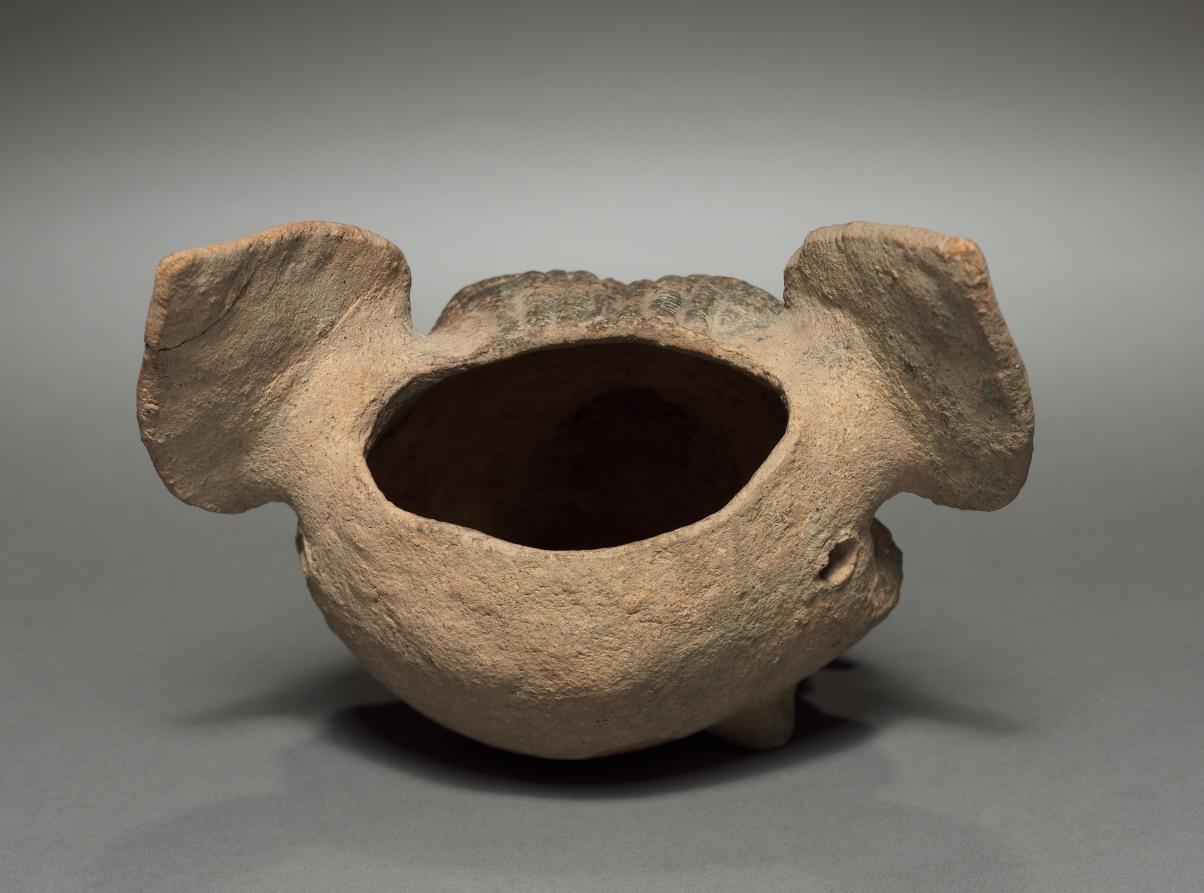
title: Dog Head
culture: Mexico, Gulf Coast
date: 500–1000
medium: earthenware, asphalt and resin paint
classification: Sculpture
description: This dog's snarl and protruding fangs lend him a sinister expression. Although pierced for suspension, the head seems too large and fragile to have been a pendant. Press-molds, used to create the dog's face and ears, were commonly used in the Gulf Coast region, where asphalt occurs naturally and was applied to pottery as a paint after firing.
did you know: This ceramic was analyzed using thermoluminescence dating; it was fired between 900 and 1,500 years ago.